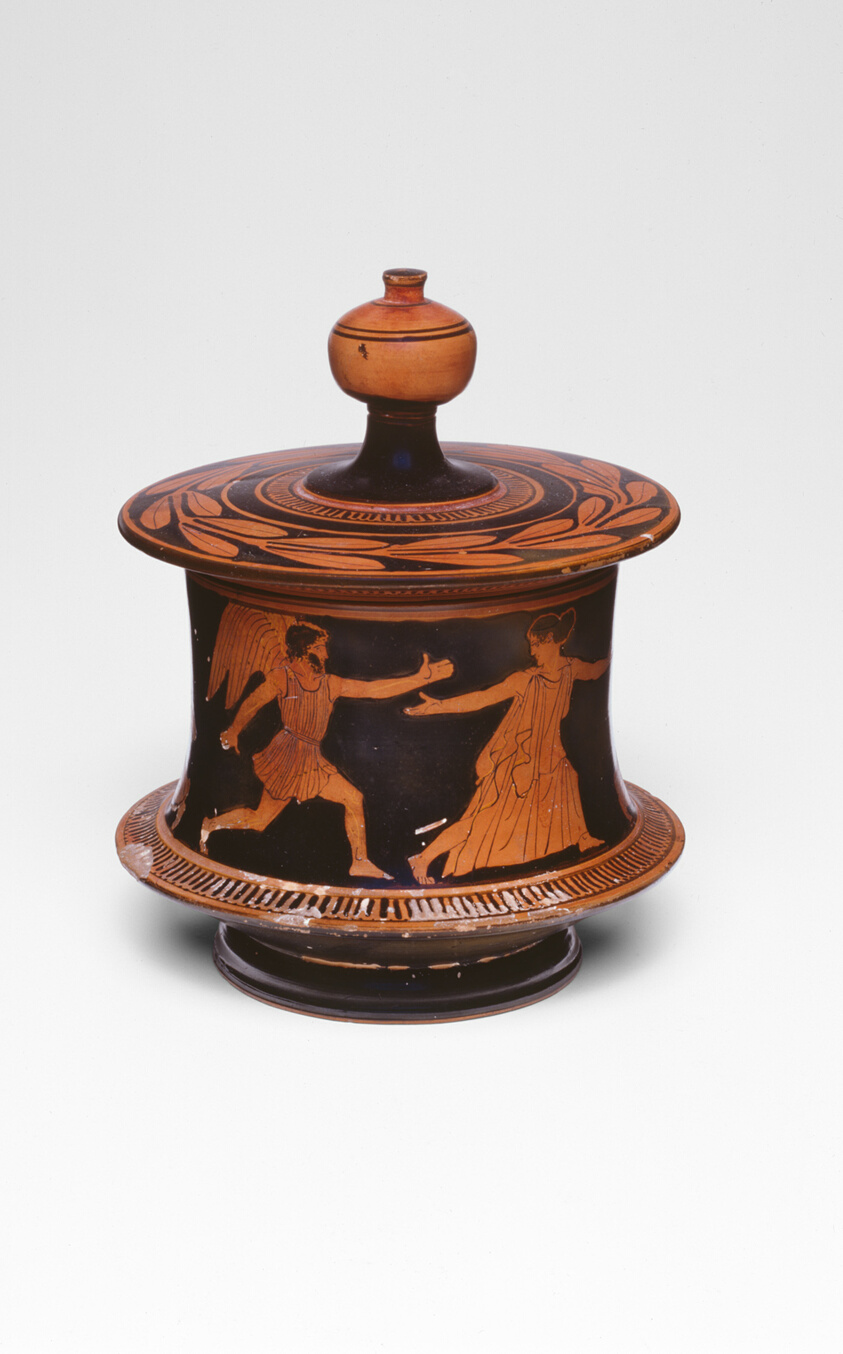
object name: Vessel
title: Pyxis (Container for Personal Objects)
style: red-figure, greek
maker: Attributed to the Euaion Painter; Greek; Athens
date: 450-440 BCE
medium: terracotta, red-figure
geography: Greece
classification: vessel; ancient art